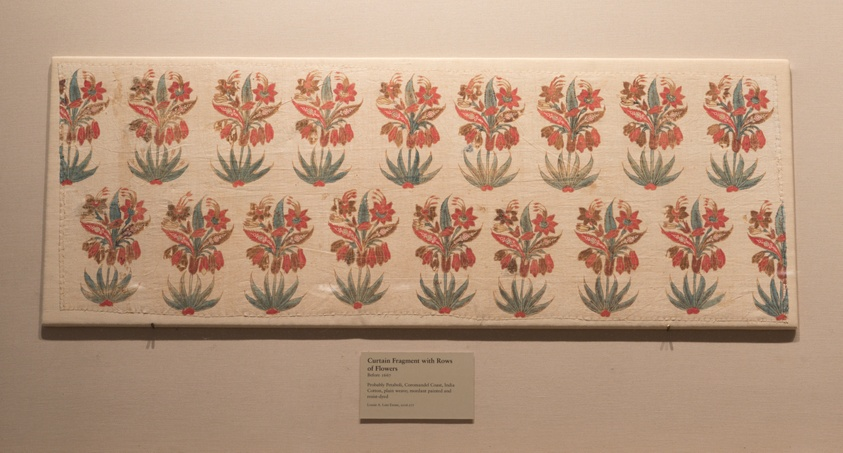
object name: Textile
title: Curtain Fragment with Rows of Flowers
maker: India; Coromandel Coast, probably Petaboli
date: Before 1667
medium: Cotton, plain weave; mordant painted and resist-dyed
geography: India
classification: weaving; textile